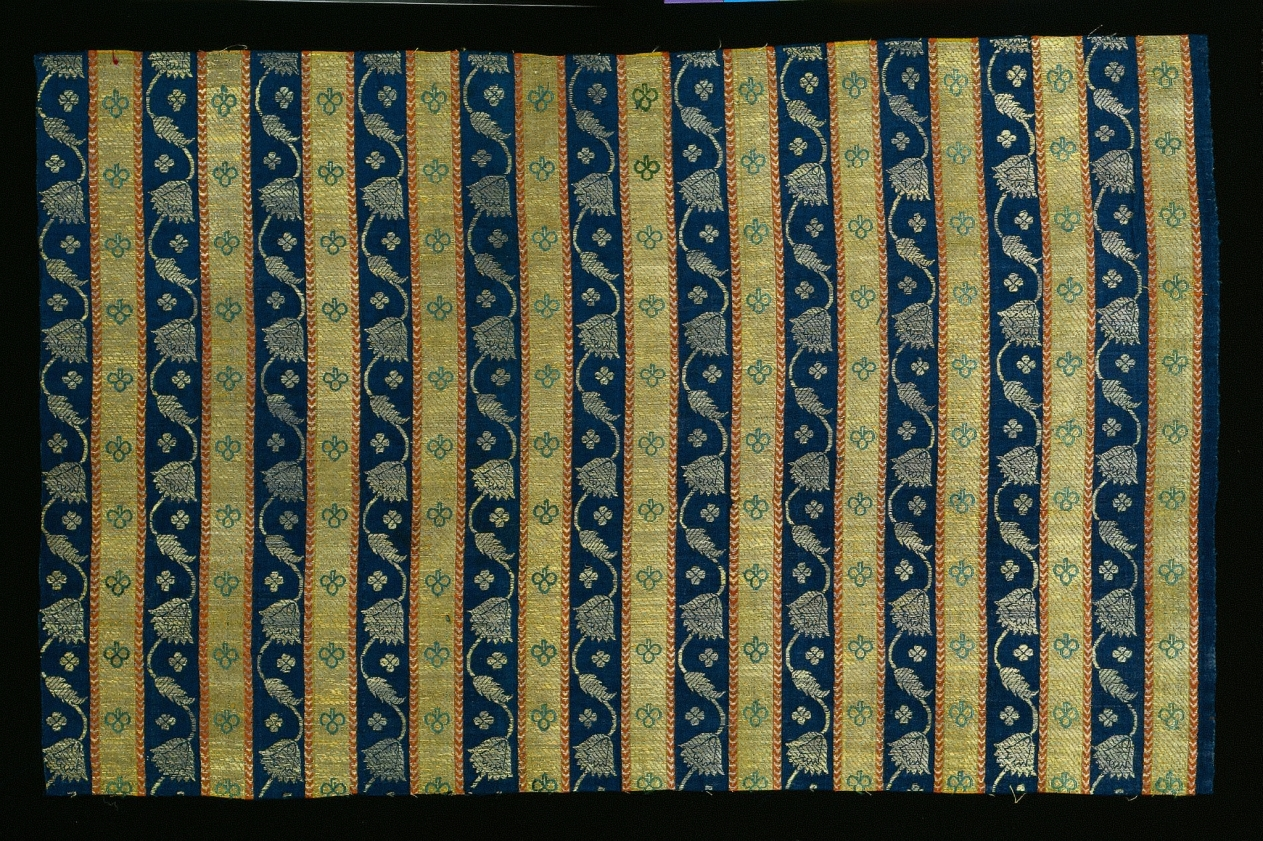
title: Striped Brocade with Flowering Vine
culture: Western India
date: 1700s–1800s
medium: Cotton and silk: brocade, “kimkhwab”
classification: Textile